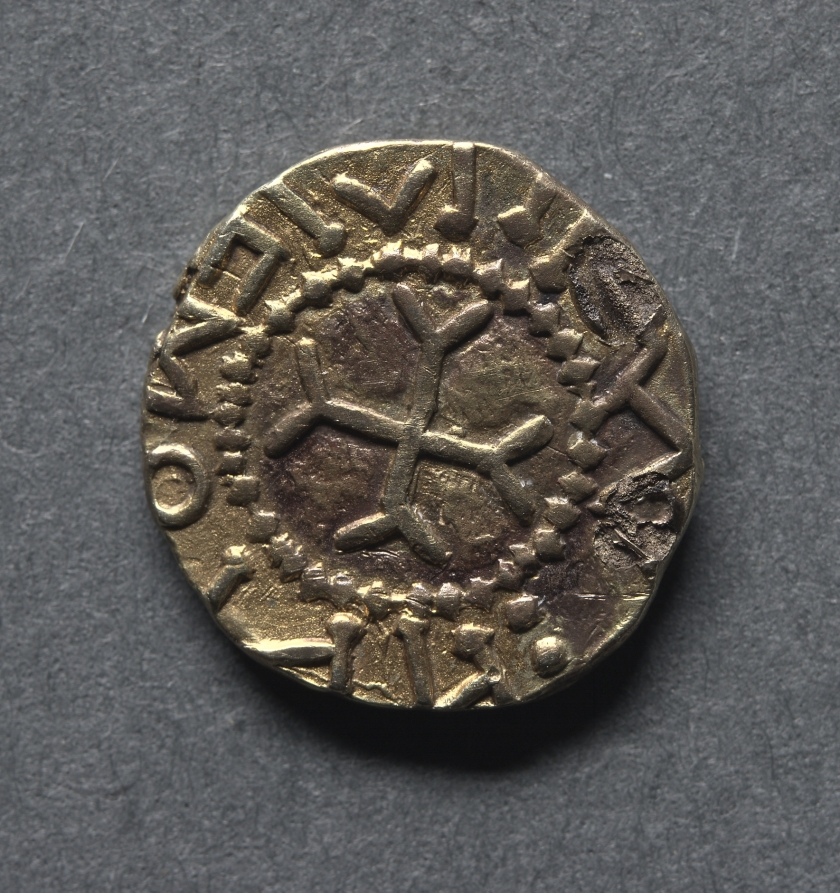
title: Witmen Tremissis: Cross Fourchée (reverse)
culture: England, Anglo-Saxon, early 7th century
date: early 600s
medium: gold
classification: Coins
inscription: WITMEN MONITA